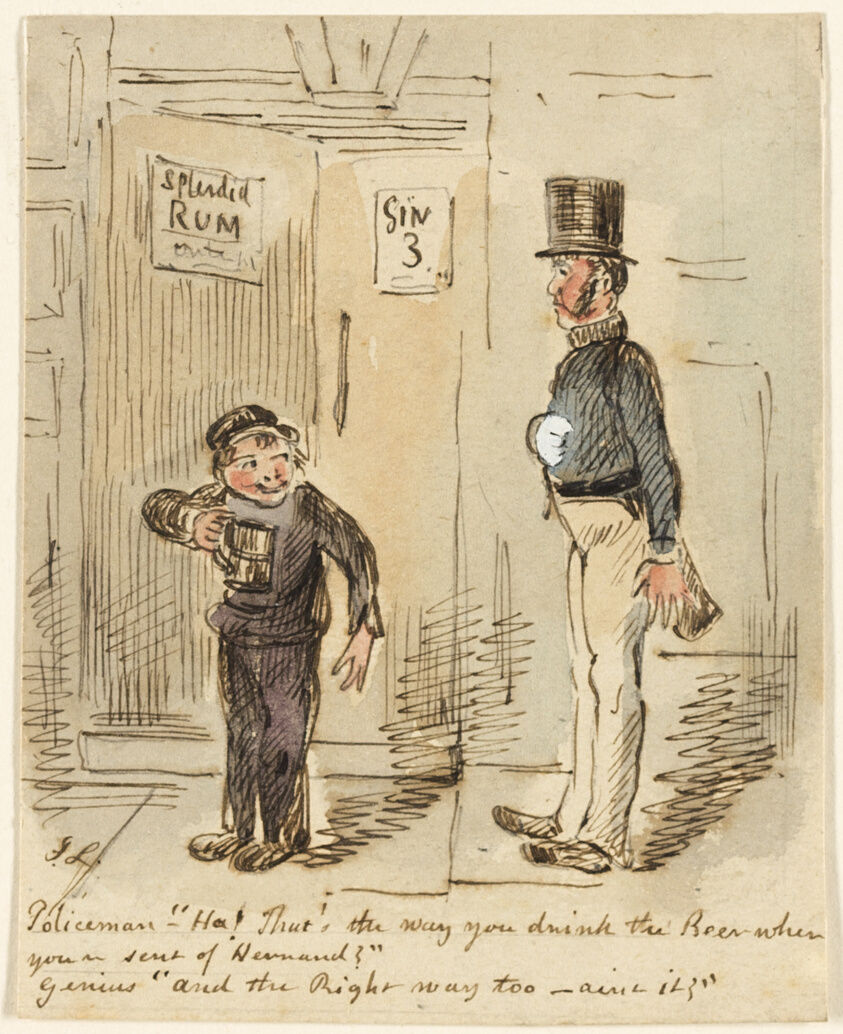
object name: Drawing and Watercolor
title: Policeman and Boy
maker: John Leech (English, 1817-1864)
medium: Watercolor and pen and brown ink, with touches of white gouache, over graphite, on cream wove paper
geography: England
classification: watercolor; drawings (visual works); prints and drawing